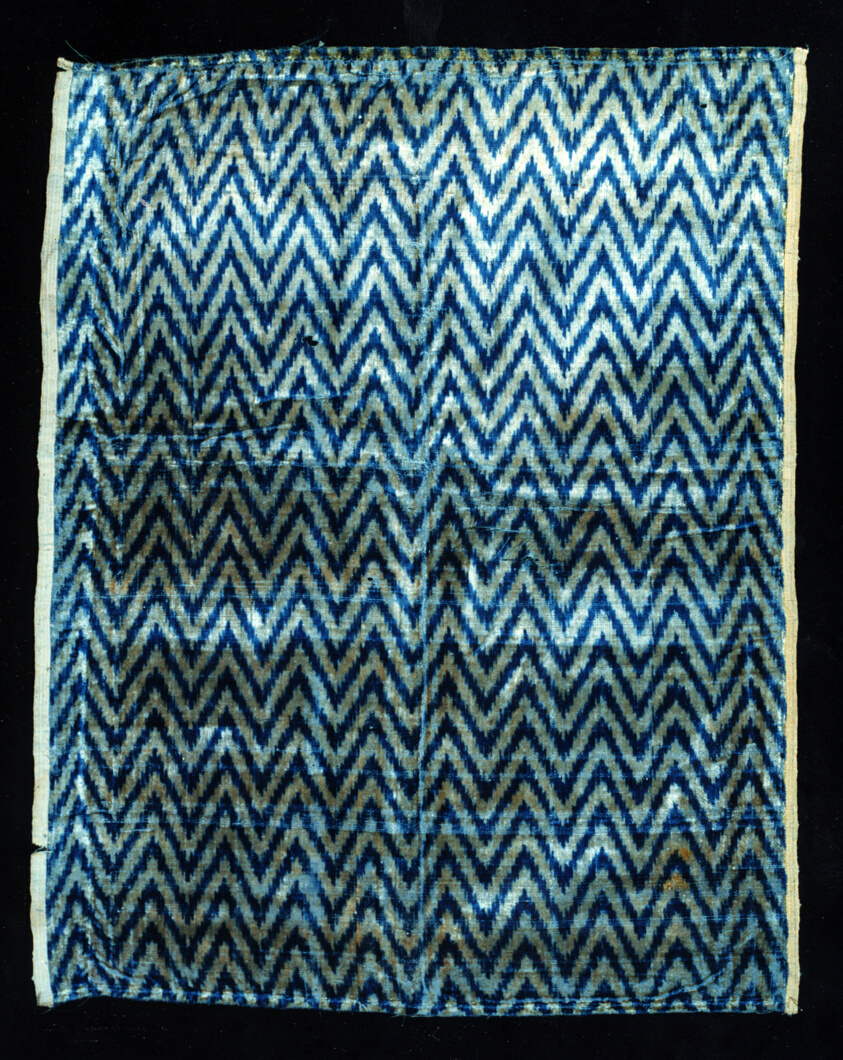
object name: Textile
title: Panel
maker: Probably Italy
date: 17th century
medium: Silk, warp-float faced 3:1 twill weave with resist dyed supplementary pile warps forming cut solid velvet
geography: Italy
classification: textile; weaving - velvet